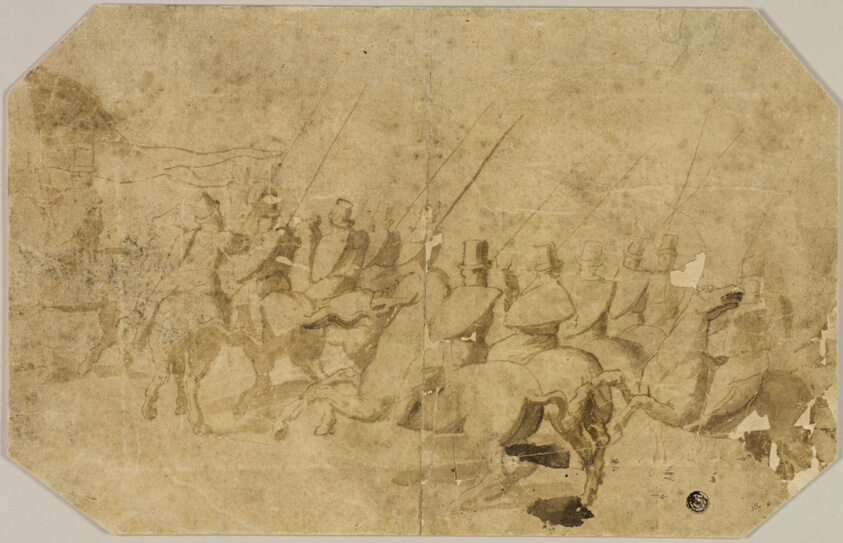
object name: Drawing and Watercolor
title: A Company of Horsemen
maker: After Battista Franco, called Il Semolei (Italian, c. 1510-1561); or School of Raphael (Italian, 1483-1520)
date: c. 1510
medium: Brush and brown ink and wash, on tan laid paper, laid down on ivory board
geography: Italy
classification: ink and wash; drawings (visual works); prints and drawing